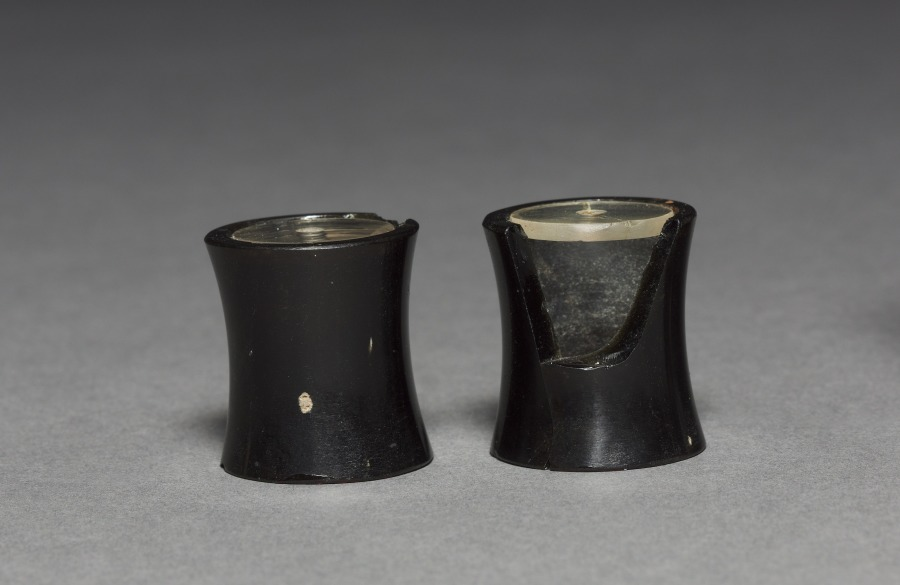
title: Pair of Ear Ornaments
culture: Mexico, Guerrero, Ichcatiopan, Mixtec or Aztec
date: c. 1200–1519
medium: obsidian, crystal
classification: Jewelry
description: This set of ear ornaments, each with a rock crystal insert, is said to have been found with a pendant made of jade and gold (1983.190). They may come from a buried offering or the tomb of an Aztec noble.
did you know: These obsidian ear ornaments look black but have a golden sheen.